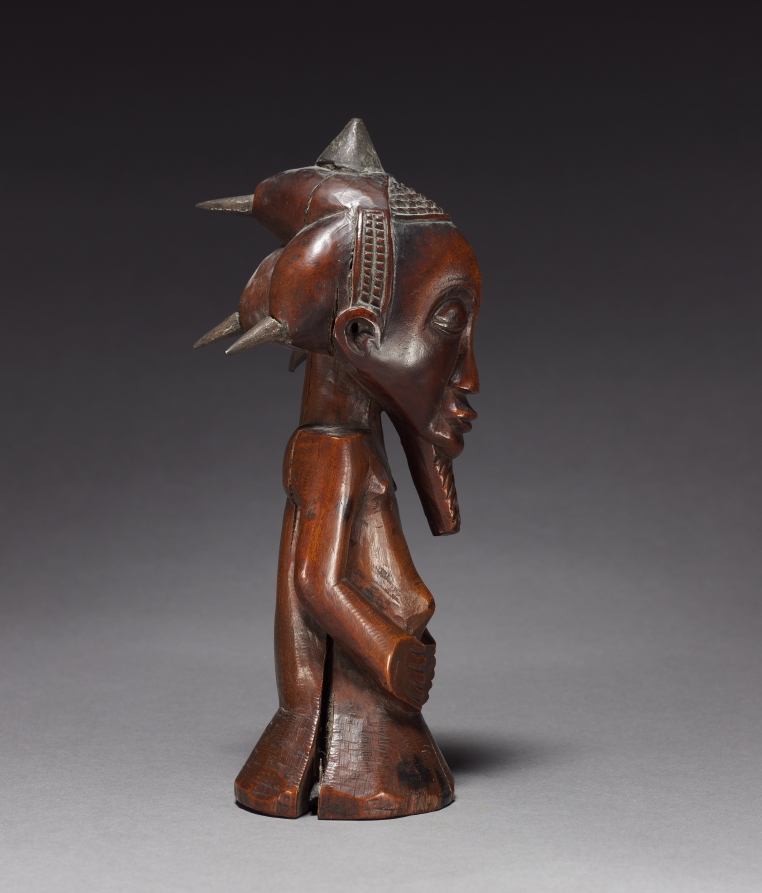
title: Half-Figure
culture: Africa, Central Africa, Democratic Republic of the Congo, probably Kusu-style maker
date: late 1800s–early 1900s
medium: Wood and iron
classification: Sculpture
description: Iron tacks inserted into the lobes of the hairdo indicate that this sculpture was originally empowered with magical and medicinal substances. Thus charged, the figure would have been used in divination and was related to a powerful association known as Bugabo. Members specialized in healing, hunting, and fighting crime.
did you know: This figure would have been used in a powerful association known as Bugabo, specializing in healing, hunting, and fighting crime.